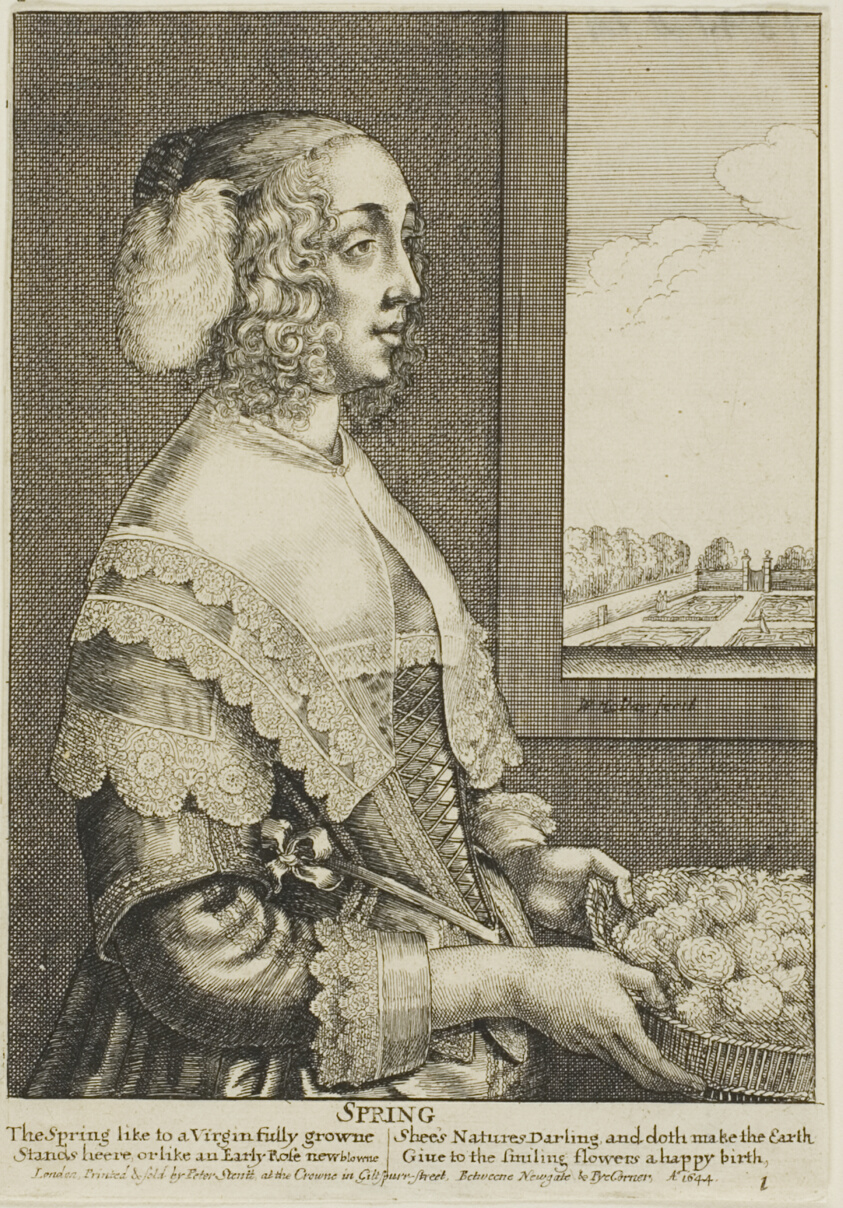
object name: Print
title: Spring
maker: Wenceslaus Hollar (Bohemian, 1607-1677)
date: 1644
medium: Etching on ivory laid paper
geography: Bohemia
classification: etching; print; prints and drawing